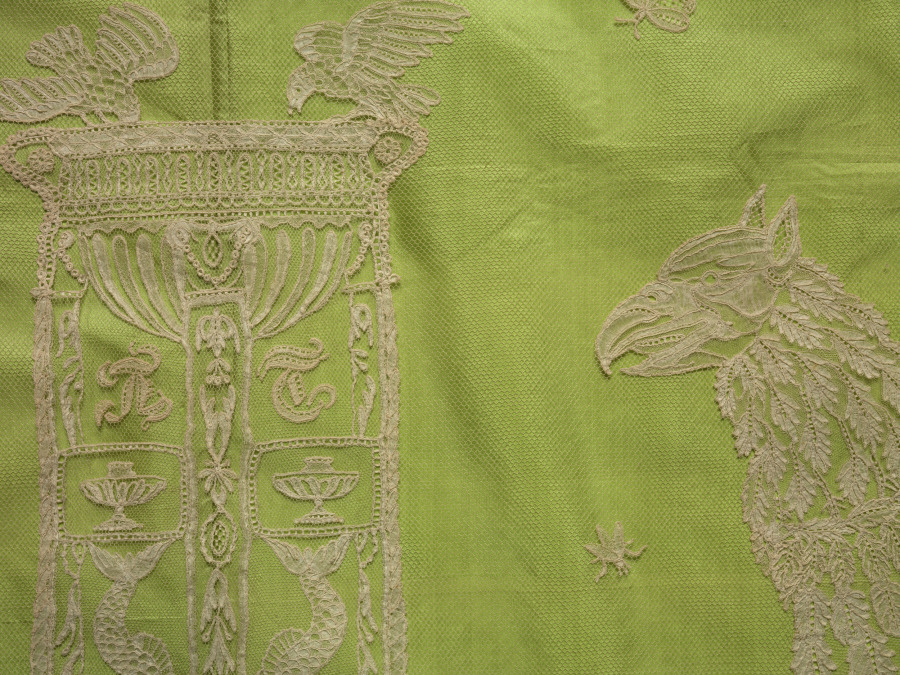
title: Lace Panel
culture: Belgium, Brussels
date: early 1800s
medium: point plait appliqué bobbin lace on machine-made net; separately applied machine-made lace edging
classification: Lace